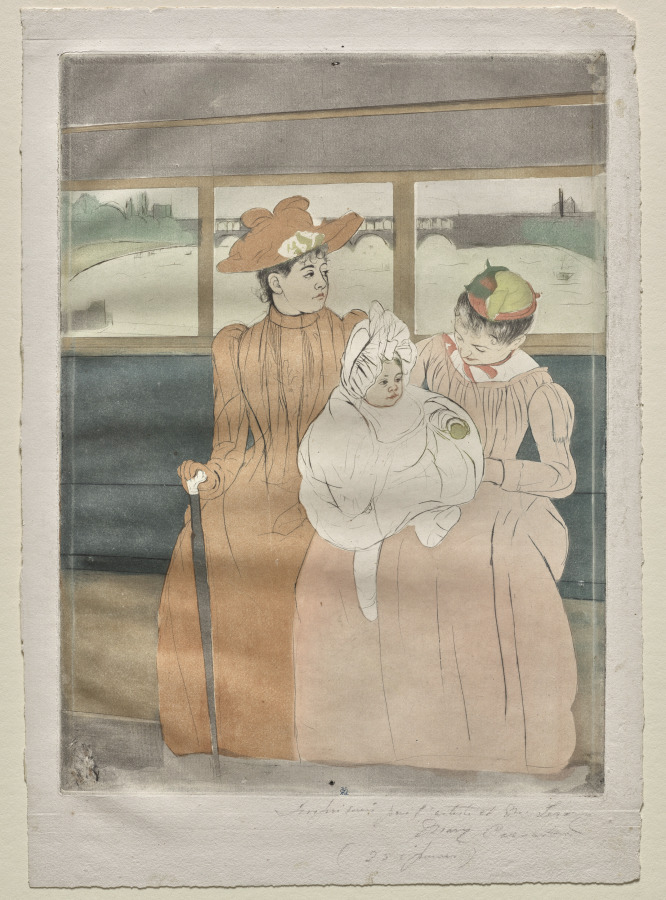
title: In the Omnibus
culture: France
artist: Mary Cassatt (American, 1844–1926)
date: 1890–91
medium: color drypoint and aquatint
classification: Print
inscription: inscribed, in pencil, at lower right below platemark: Imprimé par l'artiste et M. Leroy / Mary Cassatt / (25 épreuves); stamped at bottom center, in blue ink, on platemark: MC [Lugt 604]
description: This print belongs to a series of color etchings created by Mary Cassatt between 1890 and 1891. Each was influenced by the artist's study of Japanese woodblock prints, especially in their use of flat planes of color and domestic subject matter. In the scene depicted here, a middle-class woman accompanies her nursemaid and child on errands throughout Paris. The group rides in an omnibus, a form of public transportation where different genders and classes could intermingle. While the nanny's attention stays focused on her young charge, the female subject appears distracted, gazing toward the world beyond.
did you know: The artist Camille Pissarro described the series of prints to which this work belongs as "admirable, as beautiful as Japanese work," praising Cassatt's translation of Ukiyo-e woodblocks.